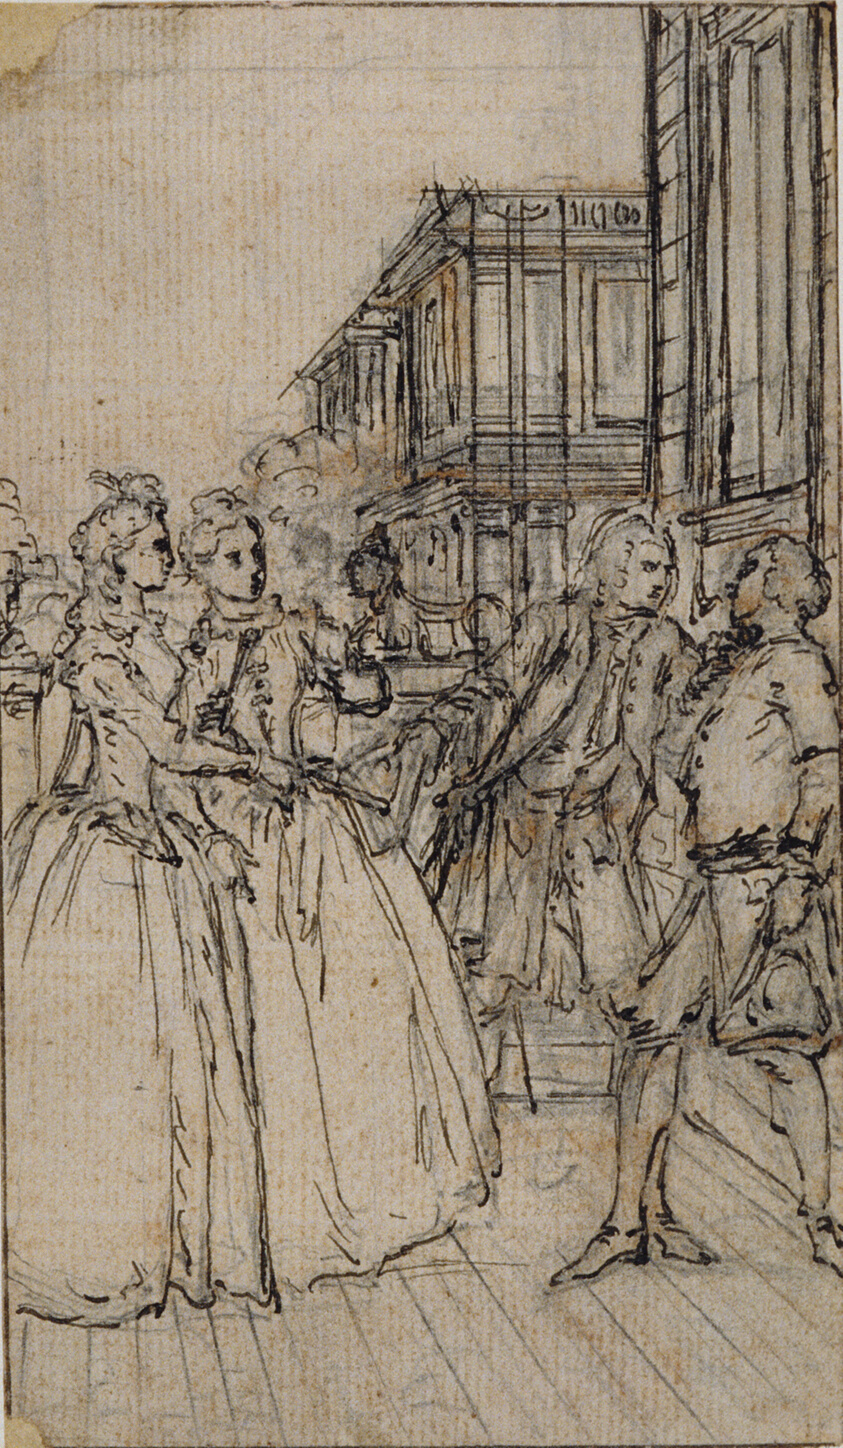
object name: Drawing and Watercolor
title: Literary Illustration with Two Ladies and Two Gentlemen in a Street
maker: Hubert François Gravelot (French, 1699-1773)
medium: Pen and brown ink over graphite and red chalk, on cream laid paper, laid down on ivory laid paper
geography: France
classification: pen and ink drawings; drawings (visual works); prints and drawing